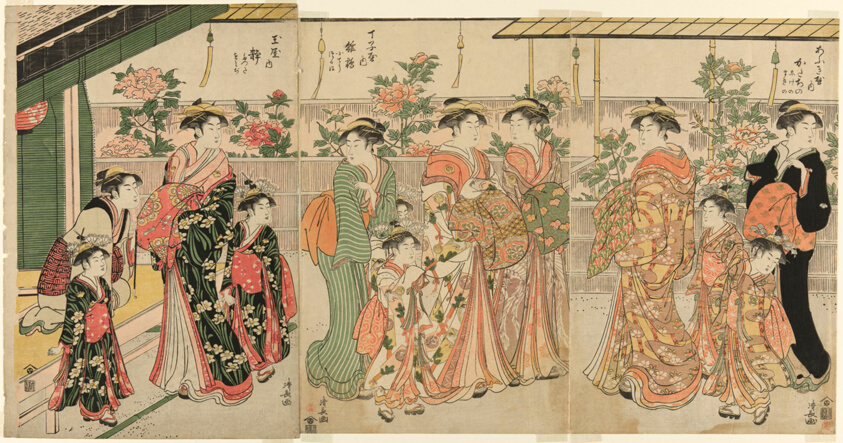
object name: Print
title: Courtesans of Yoshiwara and their attendants viewing the peonies on Nakanocho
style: Japanese (culture or style)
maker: Torii Kiyonaga (Japanese, 1752-1815)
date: c. 1787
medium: Color woodblock print; center and right sheets of oban triptych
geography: Japan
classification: woodblock print; print; asian art